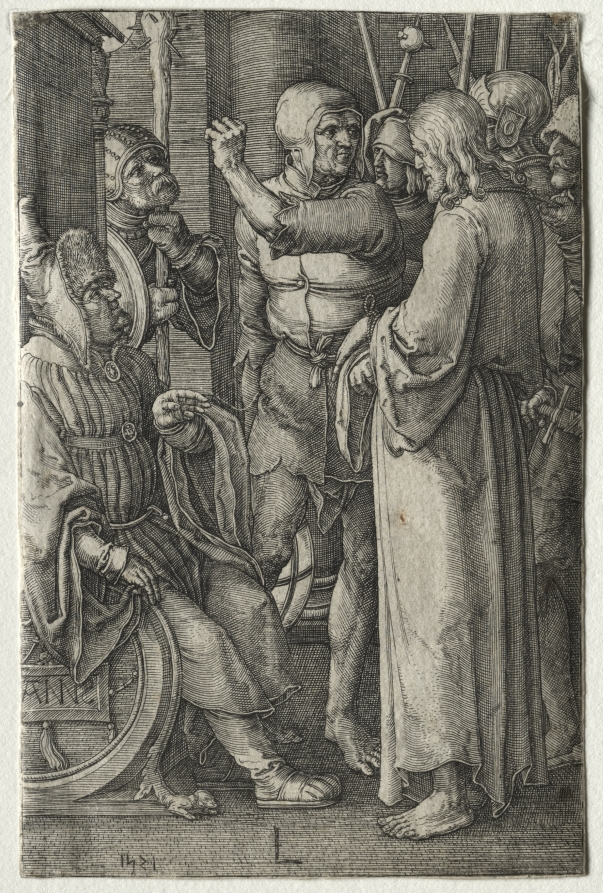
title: The Passion: Christ Before the High Priest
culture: Netherlands, 16th century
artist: Lucas van Leyden (Netherlandish, 1494–about 1533)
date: 1521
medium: engraving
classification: Print